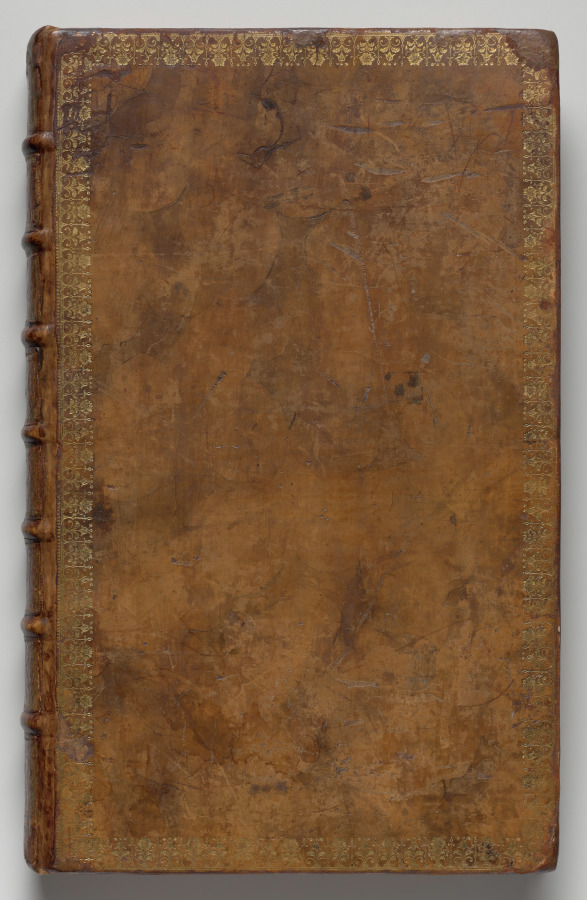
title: The Gentleman and Cabinet-Maker's Director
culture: Britain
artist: Thomas Chippendale (British, 1718–1779)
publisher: T. Becket & P. A. de Hondt (British)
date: 1762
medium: Paper, leather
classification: Bound Volume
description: Through his designs for furniture and architectural elements, Thomas Chippendale became one of the most influential tastemakers of the 1700s. He published three editions of The Gentleman and Cabinet-Maker’s Director (1754, 1755, and 1762), which sold widely in Britain, Ireland, and America. This rare French version of the third edition demonstrates his effort to spread his designs for both naturalistic and neoclassical decoration even wider across Europe.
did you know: Fewer than fifteen copies, including this one, of the French edition of Thomas Chippendale’s famous book of designs, are known to exist.